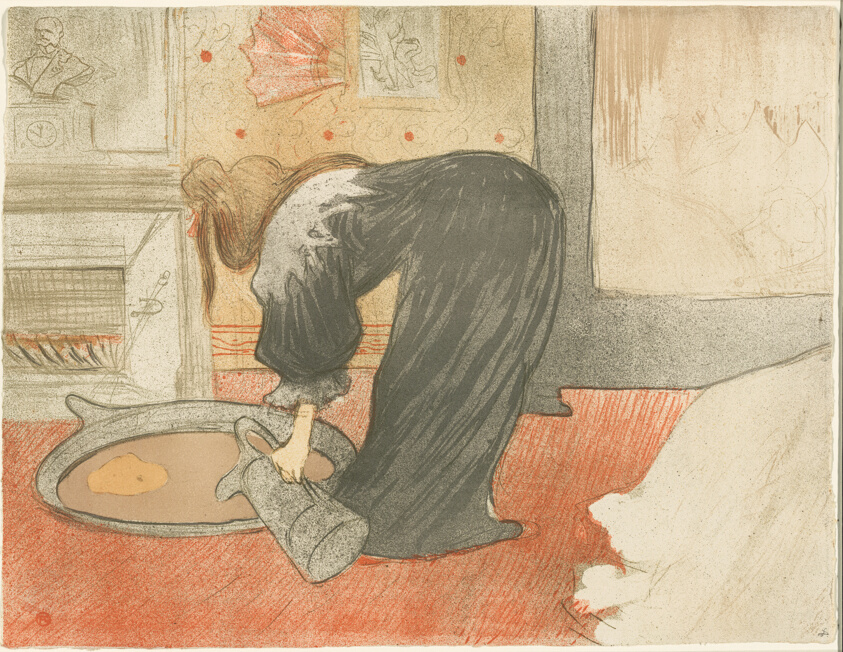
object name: Print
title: Woman with a Tub, plate four from Elles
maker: Henri de Toulouse-Lautrec (French, 1864-1901); published by Gustave Pellet (French, 1859-1919); probably printed by Auguste Clot (French, 1858-1936)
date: 1896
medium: Color lithograph on ivory wove paper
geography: France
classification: lithograph; print; prints and drawing